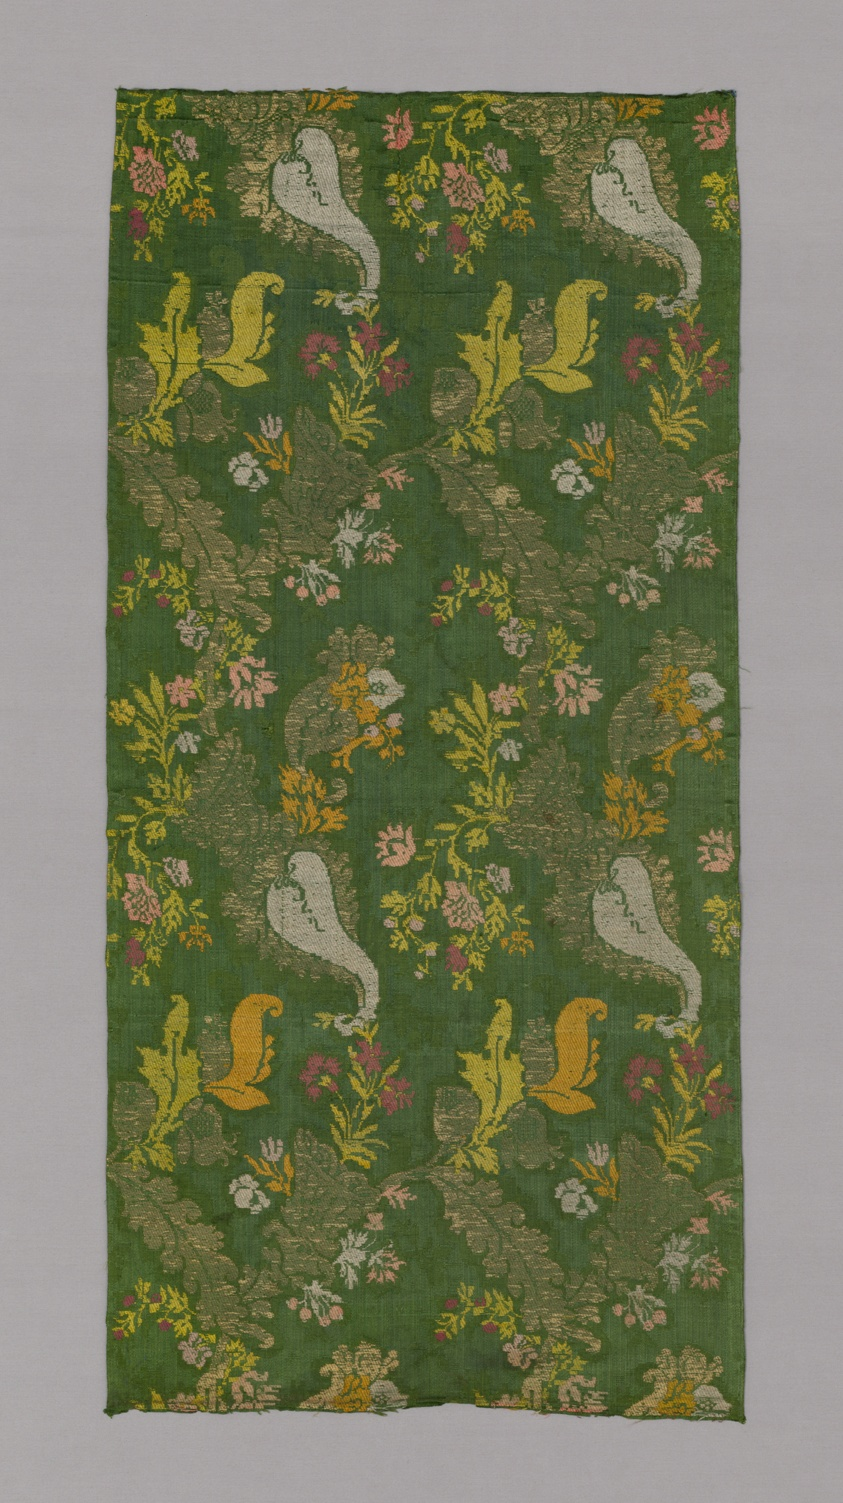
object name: Textile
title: Panel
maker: France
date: Early 18th century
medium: Silk and gilt-metal-strip-wrapped silk, satin damask weave with brocading wefts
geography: France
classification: textile; weaving